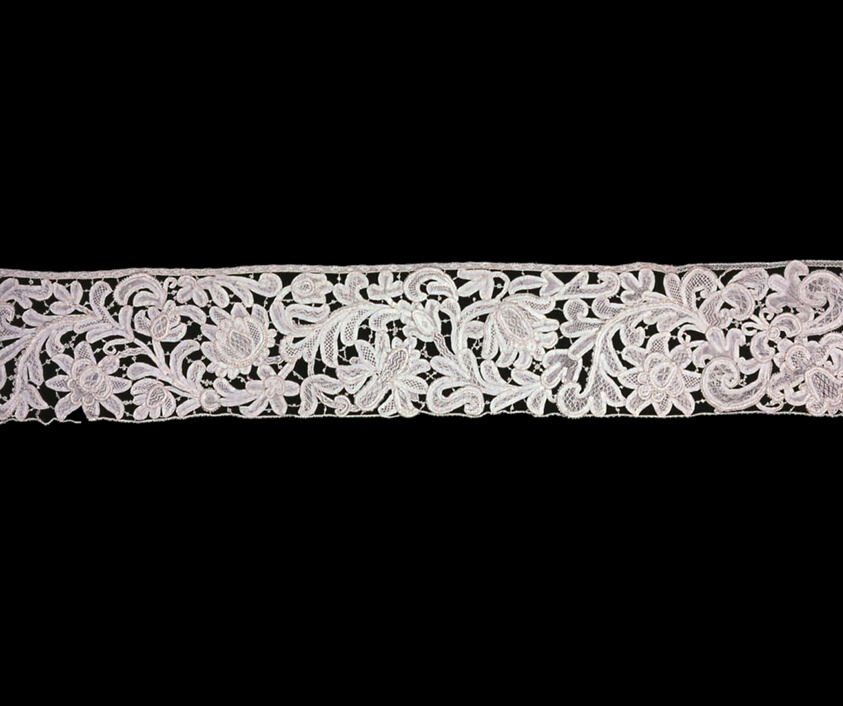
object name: Textile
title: Border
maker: Northern Europe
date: 1675/1725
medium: Linen, needle lace with woven tapes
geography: Northern Europe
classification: textile; lace - mixed; lace